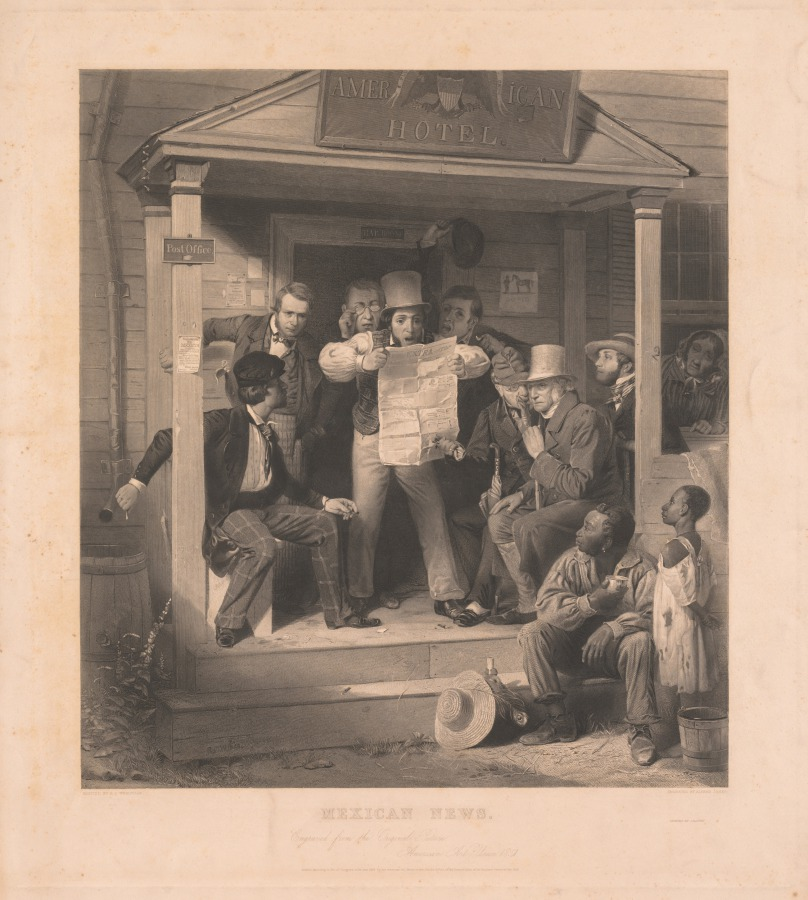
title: Mexican News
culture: America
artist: Alfred Jones (American, 1819–1900)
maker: after Richard Caton Woodville (American, 1825-1855)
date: 1851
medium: engraving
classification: Print